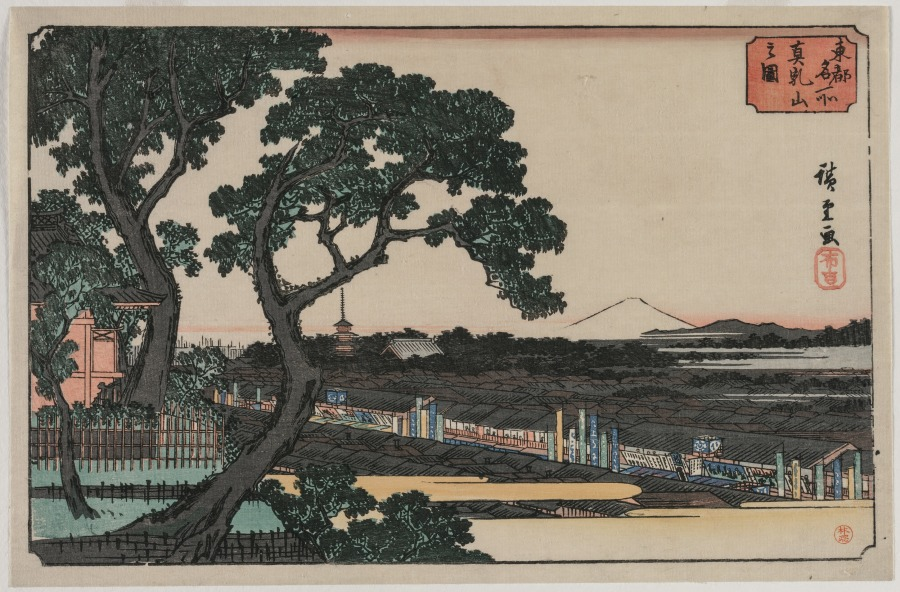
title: Picture of Matsuchiyama, from the series Famous Places in the Eastern Capital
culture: Japan, Edo period (1615–1868)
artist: Utagawa Hiroshige (Japanese, 1797–1858)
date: late 1830s or early 1840s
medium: color woodblock print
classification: Print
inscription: Signature: Hiroshige ga Publisher: Nunokichi